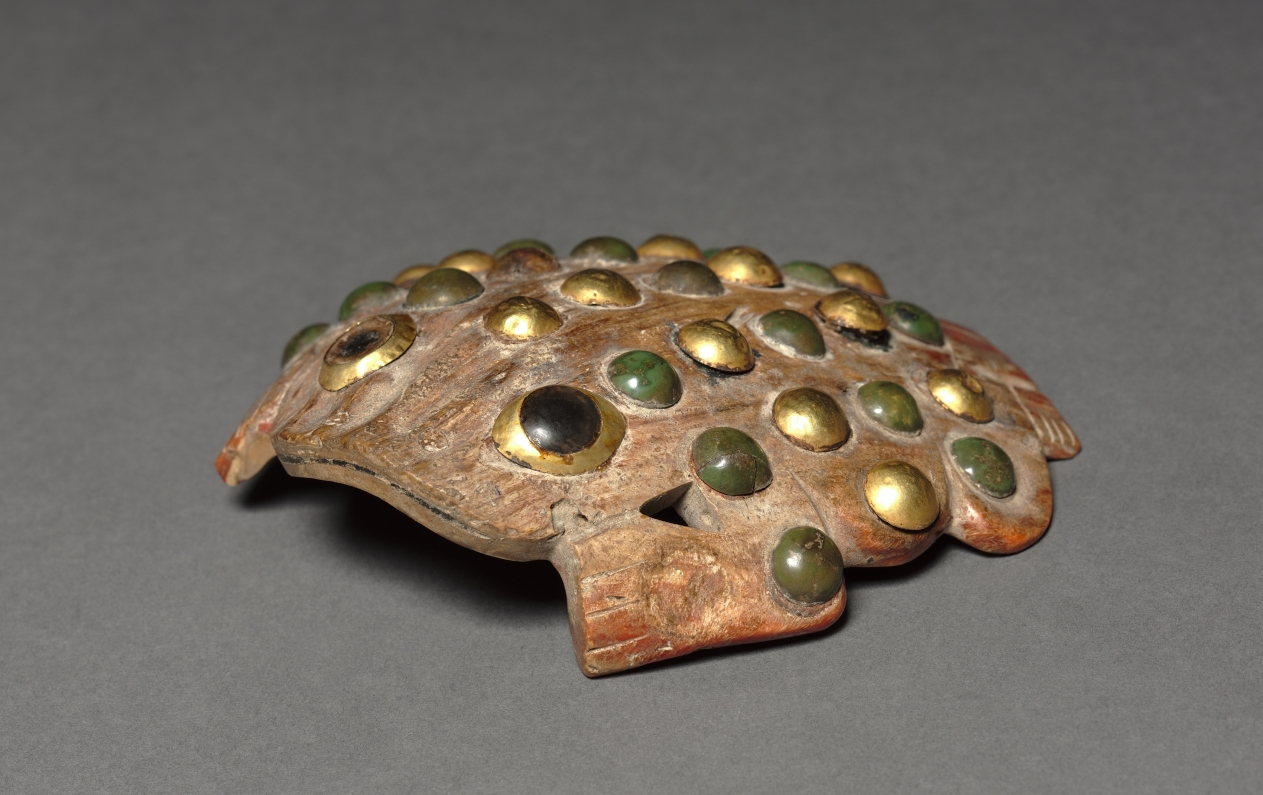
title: Frog Ornament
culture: Peru, Moche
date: 50–800 CE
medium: shell, stone, gold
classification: Jewelry